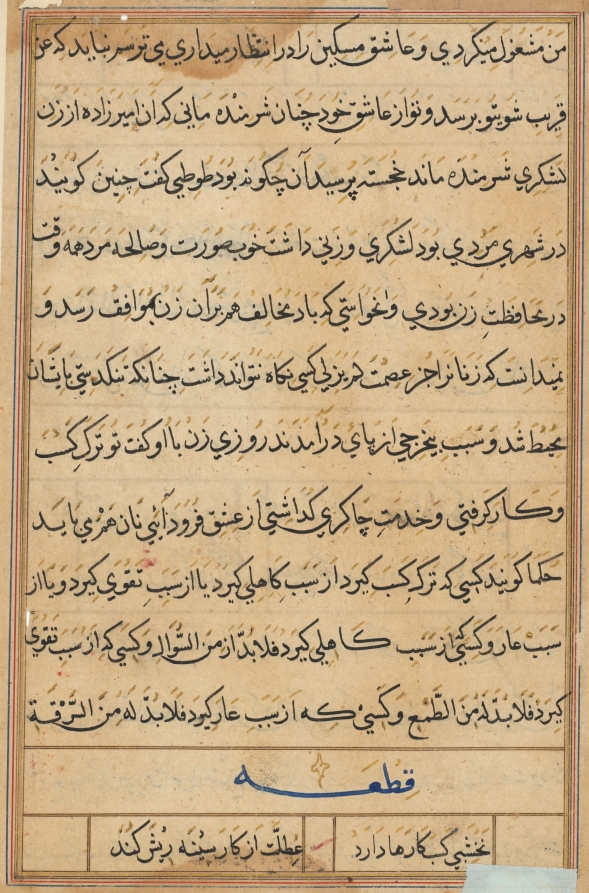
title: Page from Tales of a Parrot (Tuti-nama): text page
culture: Mughal India, court of Akbar (reigned 1556–1605)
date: c. 1560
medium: gum tempera, ink, and gold on paper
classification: Painting